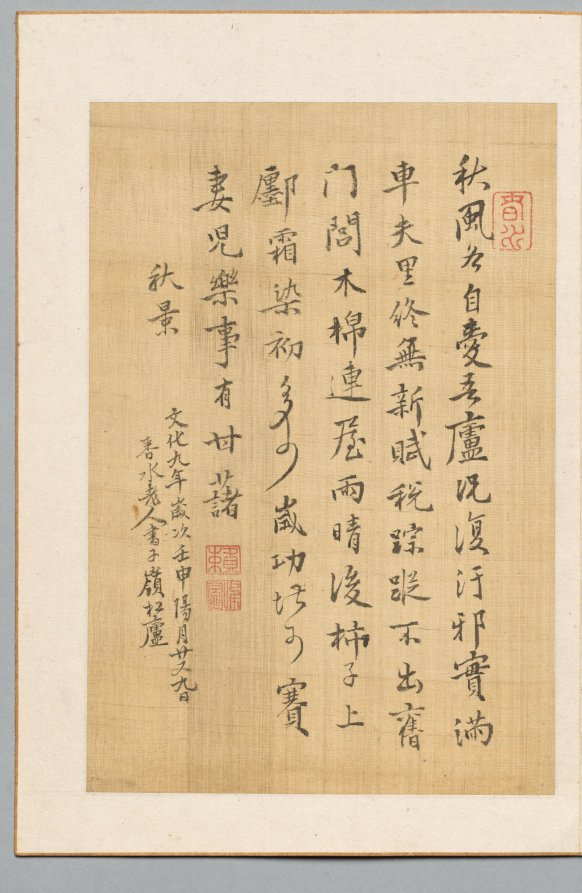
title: Poem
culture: Japan, Edo period (1615–1868)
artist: Rai Shunsui (Japanese, 1746–1816)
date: 1812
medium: leaf from a pair of folding albums; ink and light color on paper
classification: Portfolio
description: The Nanga, or "Southern School" painters of 17th- and 18th-century Japan were greatly influenced by Chinese culture. The subjects and styles of their work reflected the contemporary Japanese taste for imported Chinese objects and learning. A common practice among Nanga painters was the exchange of small paintings and calligraphies. They also celebrated special gatherings of artist-friends by producing individual sheets that were then gathered together in albums. The sheets shown here were part of such a gathering.